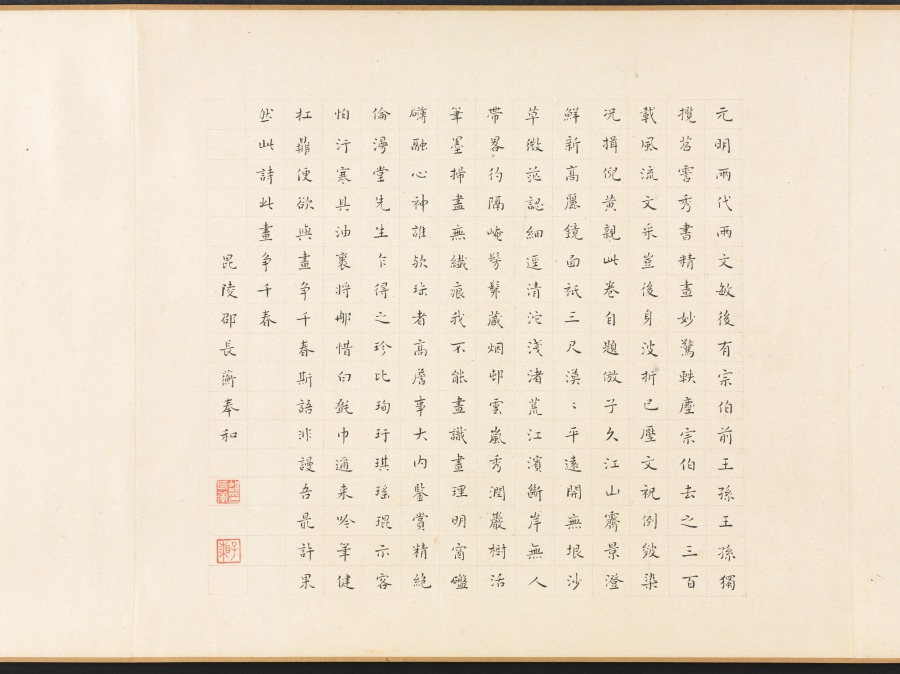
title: River and Mountains on a Clear Autumn Day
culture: China, Ming dynasty (1368–1644)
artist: Dong Qichang (Chinese, 1555–1636)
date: c. 1624–27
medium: Handscroll; ink on Korean paper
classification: Painting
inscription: 黃子久江山秋霽似此，當恨古人不見我也。思翁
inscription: 董文敏每遇高麗鏡面箋，書畫尤為入神。此卷改表紙用之，字跡隱然，兼有朝鮮之印。至於筆法圓秀，真接倪黃。豈文沈所可同日而語也。 康熙庚午中秋後一日，天氣澄爽，重裝初畢，跋於瓶廬。抱瓮翁高士奇。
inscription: Second inscription by Gao Shiqi 高士奇 (1645–1704): On the twenty-third day of the ninth month, the jiaxu year of the Kangxi era [1694], I packed my bags to head north. When my boat passed Wuchang [Suzhou], Mr. Mantang [Song Luo] brought wine to bid me farewell so that we could share our thoughts on our separation in the last few years. I showed him the paintings and calligraphy which I collected and asked his opinions. Since Mr. Mantang does not own any handscrolls by Wenmin [Dong Qichang], I leave this one for him in commemoration of our parting; thus the painting will have a worthy owner and our meeting will become a beautiful story in the future. It is the fourth day after the beginning of winter, with the sky clear and sober. Trees under frost have turned red and yellow, seemingly echoing the brush and ink in the painting. I also ask Mr. Mantang to inscribe a poem to commemorate our meeting so that it will survive forever.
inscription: 1 colophon and 4 seals of Song Luo 宋犖 (1634–1713): Who is the foremost art connoisseur of our dynasty?/ Tangcun [Liang Qingbiao, 1620–1691] is dead, so the title passes to Jiangcun [Gao Shiqi]./ Leaving office, you retired for five years in the Lake region./ Fondling handscrolls and hanging scrolls from morning to evening./ You sent me your collection catalogue Xiao Xia Lu last year;/ It is indeed the true equal of [Zhou Mi's] Yun Yan Guo Yan./ This year you returned to the capital by imperial order;/ Your boat with calligraphy and paintings anchored at the river bank in Suzhou./ When we met each other you did not waste any time for conversation by poured out immediately/ From your "coral net" extraordinary treasures./ You produced incomparable scrolls, with gold-inscribed labels and jade rollers,/ Pouring out from bags and trunks, they were spread in disarray./ Without a word, I rolled and unrolled until my fingers were numbed,/ We sat straight, facing each other quietly, and never felt tired./ For three days we forgot about sleeping and food./ And at times we shouted our joy out loud, forgetting who is host or guest./ Your Dwelling in the Fuchun Mountains and the Yuansheng manuscript/ These peerless works I myself examined with delight./ As an added pleasure to the farewell dinner under the Maple Bridge,/ You allowed me to hold again this handscroll by Dong Qichang--/ The Misty River and Piled Peaks [by Zhao Mengfu] and this Clear Autumn Day are two extraordinary masterpieces./ In showing such life and spirit with "qi yun." the artists were truly "men of heaven."/ The Clear Autumn Day is not even three feet long,/ Painted on tributary Korean paper, it shines like silver./ Every building up and every turn of the mountains imitates nature,/ Every tree and every rock is removed from the commonplace./ From the beginning, the theory of poetry is the theory of painting,/ Like the lotus and the morning sunshine, they complement and refresh each other./ The artist's inscription regrets that "the Old Masters cannot see my scroll."/ Huang Gongwang would have agreed in his grave./ The vermilion of the seals glitter and dazzles the eyes,/ These added accessories are as valuable as jade./ You are very kind to give it to me,/ The feelings expressed in your inscription are so sincere./ Wanting to refuse, but unable, I accept it to respect your wish,/ And taking off my gown and cap I wrapped it with care./ You asked me to write a long poem in commemoration of this beautiful occasion,/ I am too ashamed that my effort in response is so poor and inadequate./ Returning home, I unrolled it under candlelight, trying to write the colophon,/ The light of the waning moon shines at the foot of the mossy wall./ Earnestly humming and brows knit in deep thought, I try to compose;/ The verses are not outstanding, but the facts are real./ With this poem recorded at the end of the scroll, I mail it to you for approval,/ This poem and this painting shall outlast a thousand springs. (Translation by LYSL/HK/WKH)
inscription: 1 colophon and 2 seals of Shao Changheng 邵長蘅 (1637–1704); 2 inscriptions and 14 seals of the Qianlong 乾隆 emperor (r. 1736–95); 1 seal of the Jiaqing 嘉慶 emperor (r. 1796–1820); 3 seals of the Xuantong 宣統 emperor (r. 1908–11); 1 seal unidentified.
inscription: [印] 朝鮮國王之印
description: Dong Qichang had a tremendous impact on the artistic practices and historiography of later generations; his works and writings shaped literati aesthetics. Here, Dong places an abstract landscape composition diagonally across the picture plane, configured to recall earlier masters and simultaneously express his own personal style. Dong’s inscription claims, Huang Gongwang’s Autumn Day, looks like this. I truly regret the master has not seen my work. In fact, Dong Qichang may have had Dong Yuan’s Xiao and Xiang Rivers in mind, a work he owned and considered a key work in Chinese art history.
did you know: The painting has an imprint of a Korean seal that reads "Seal of the king of Joseon."